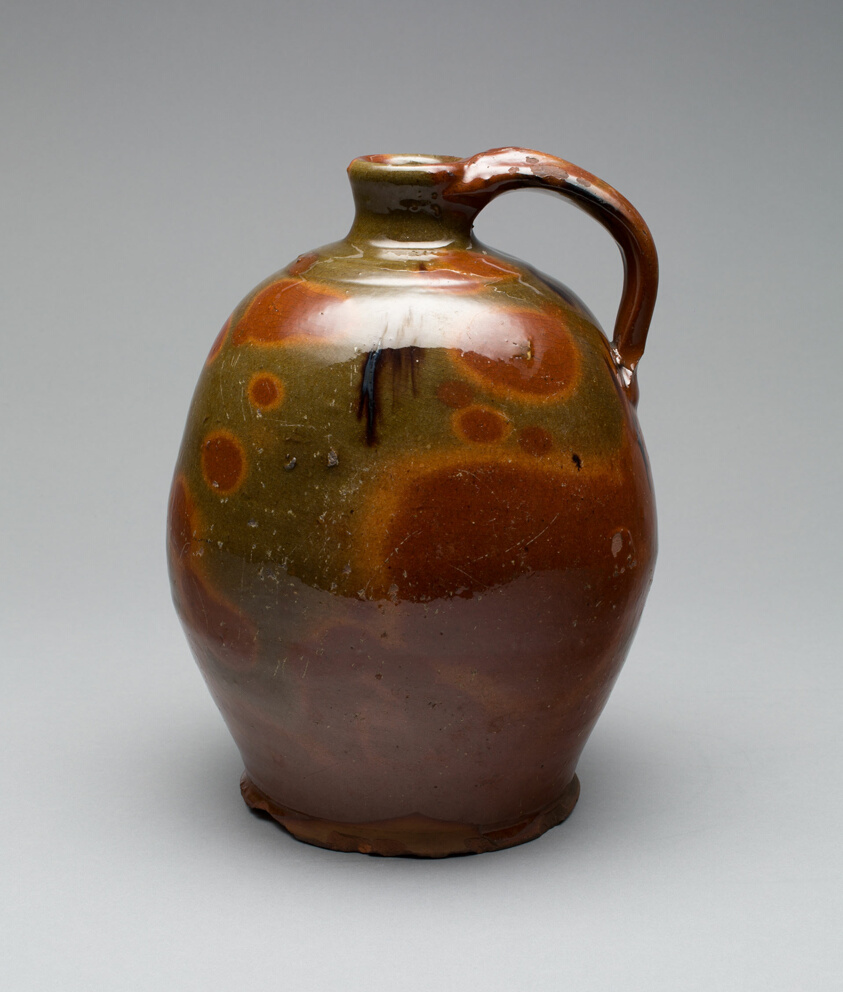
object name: Decorative Arts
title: Jug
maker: Artist unknown (American, 18th–19th century); New England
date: 1790–1830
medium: Earthenware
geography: New England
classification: vessel; american decorative arts; american arts; ceramics; decorative arts